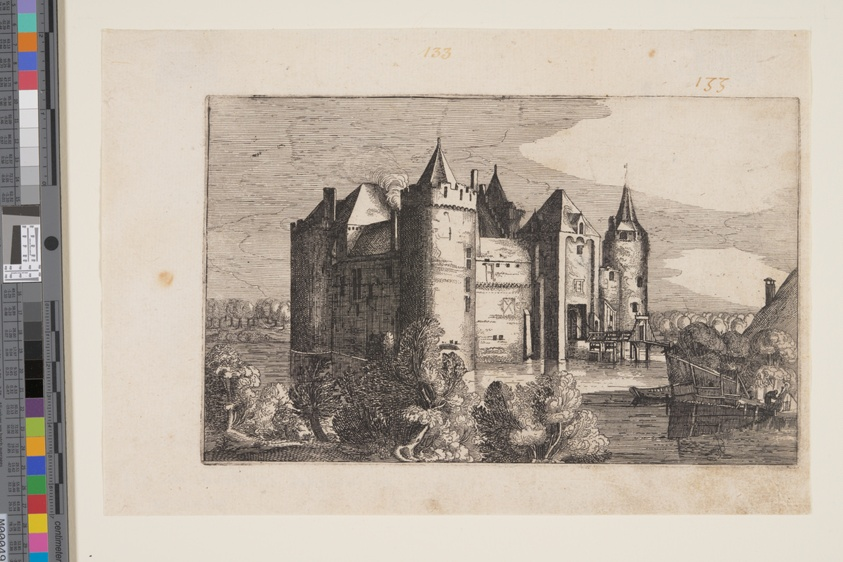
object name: Print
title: The Castle of Muiden, from Four Castles in Holland and Utrecht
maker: Claes Jansz. Visscher (Netherlandish, c. 1550–c. 1612)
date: c. 1617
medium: Etching on ivory laid paper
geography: Netherlands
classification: print; paper; prints and drawing; etching